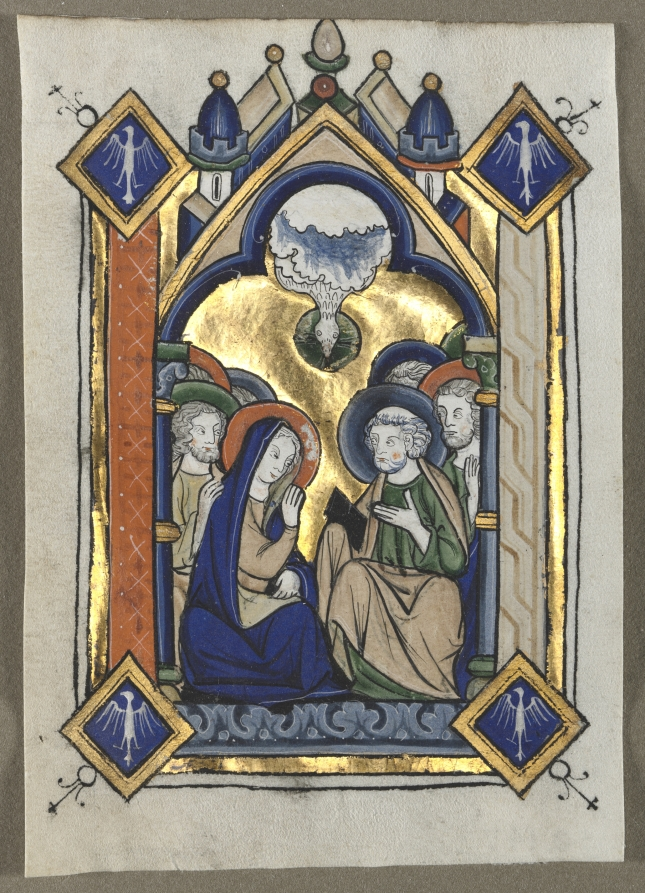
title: Leaf Excised from a Psalter: The Pentecost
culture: Flanders, Liège(?), 13th century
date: c. 1260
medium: tempera and burnished gold on vellum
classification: Manuscript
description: Traditional locations within manuscript psalters were designated by decorated initials or, as is the case here, full-page miniatures. These locations marked the major divisions of the psalms as used in the daily office. The extraordinary quality of these miniatures suggests they once decorated a deluxe psalter made for a wealthy or aristocratic patron, possibly a cleric.